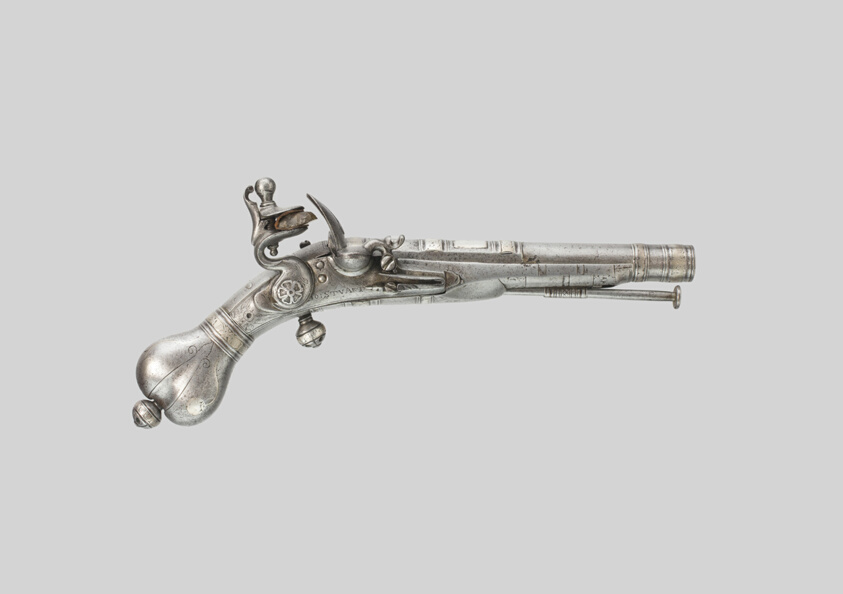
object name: Arms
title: Flintlock Belt Pistol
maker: Gunsmith: John Stuart (Scottish); Eastern Lowlands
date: c. 1700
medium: Steel, silver, leather, and flint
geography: Scotland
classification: firearm-handgun; arms; arms and armor